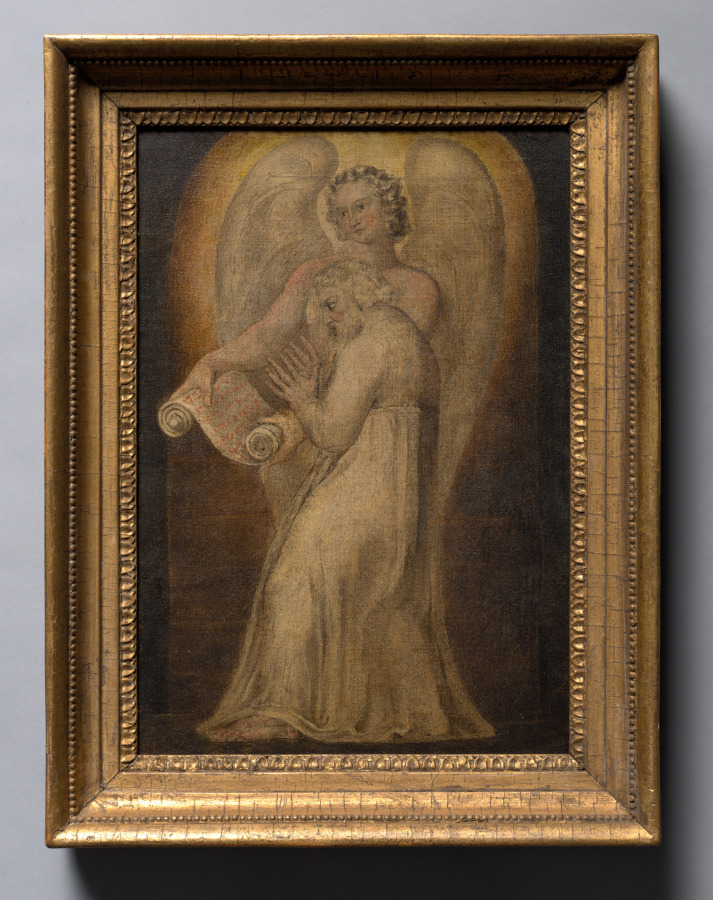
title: St. Matthew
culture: England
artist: William Blake (British, 1757–1827)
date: 1799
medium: tempera on canvas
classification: Painting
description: The energy and awe with which the evangelist Saint Matthew responds to the angel presenting the divinely inspired text echoes William Blake’s attitude toward artistic inspiration. From childhood Blake experienced visions that are reflected in the otherworldliness of his work. While Blake was not embraced by the fine art establishment, a small group of patrons believed in his genius and commissioned works in which his unusual visions had free rein.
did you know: Like St. Matthew, William Blake reported having visions of angels throughout his life.